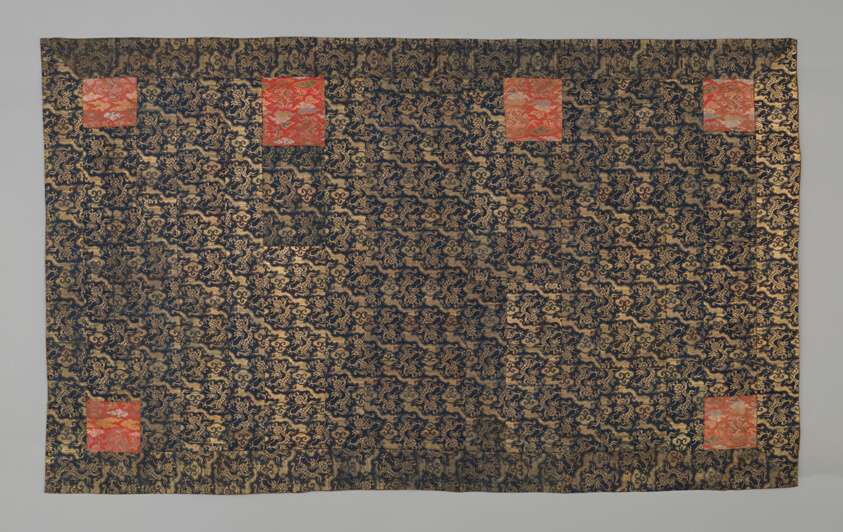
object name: Textile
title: Kesa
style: edo (japanese period)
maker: Japan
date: late Edo period (1789–1868), late 18th/early 19th century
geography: Japan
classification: textile; costume; liturgical - buddhist; weaving